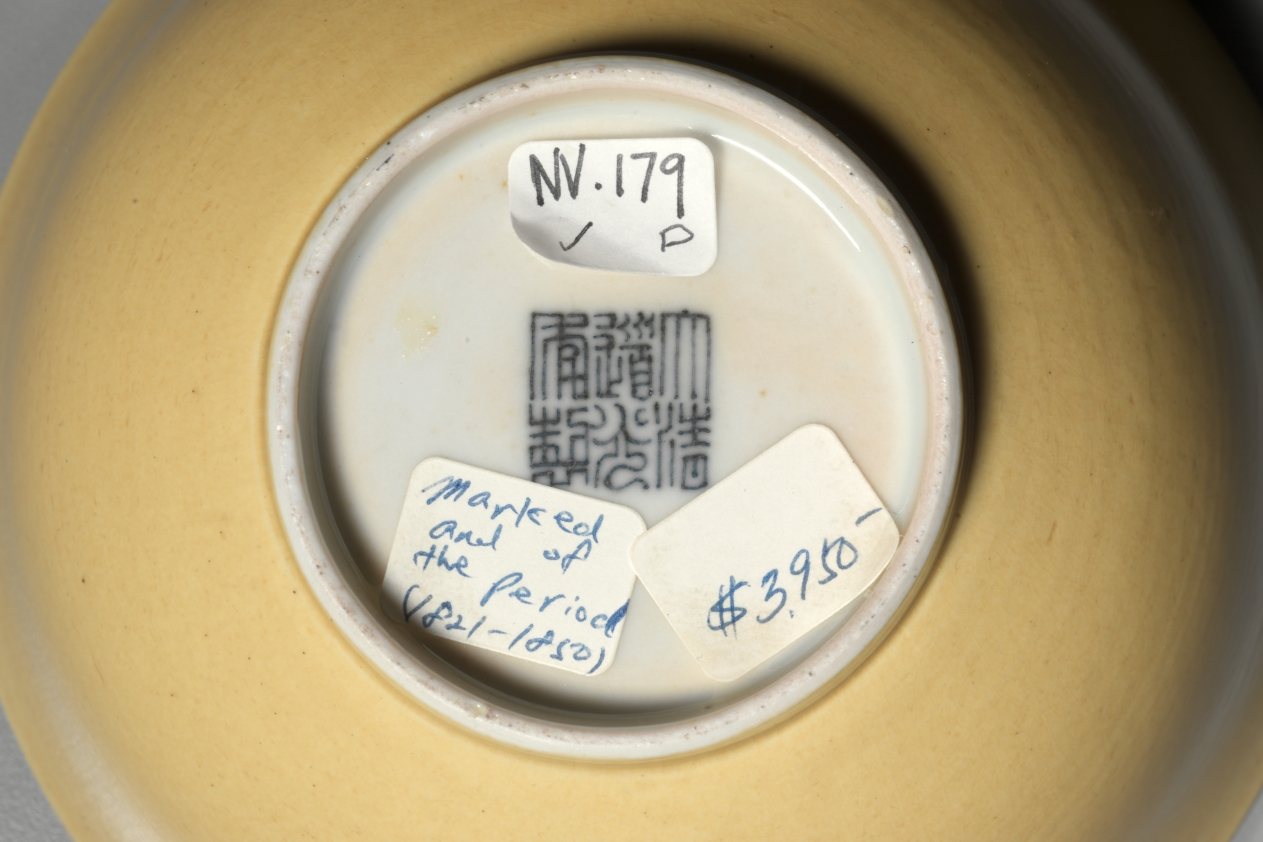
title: Bowl with Yellow Glaze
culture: China, Qing dynasty (1644-1911), Daoguang mark and reign (1821-50)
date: 1821–50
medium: glazed porcelain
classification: Ceramic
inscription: 大清道光年制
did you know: This monochromatic yellow dish was made for the imperial household.